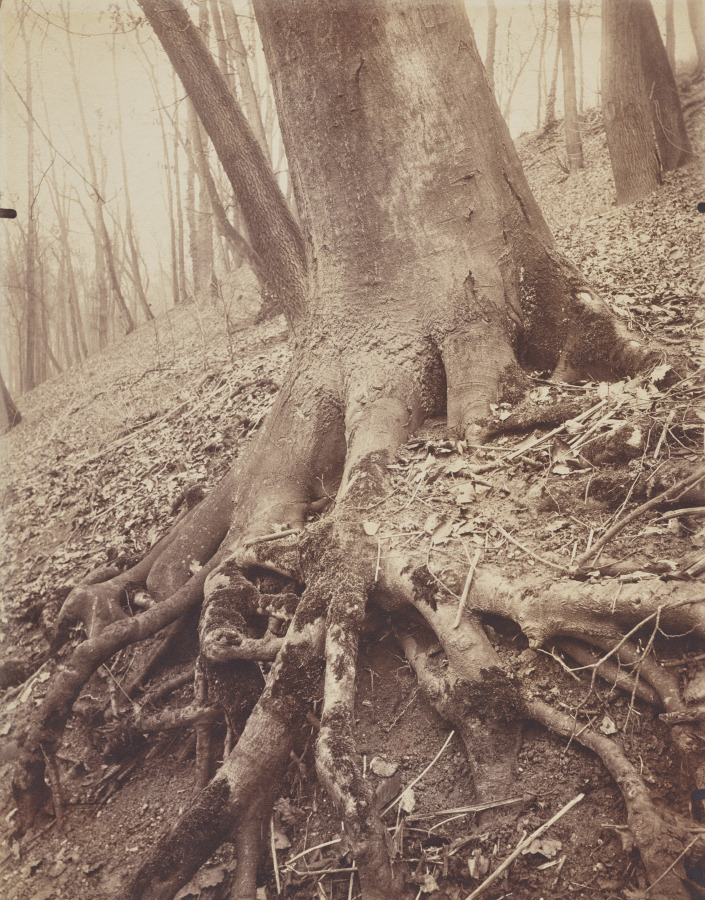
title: Trees and Roots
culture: France, 20th century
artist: Eugène Atget (French, 1857–1927)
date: 1900s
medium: albumen print from wet collodion negative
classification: Photograph